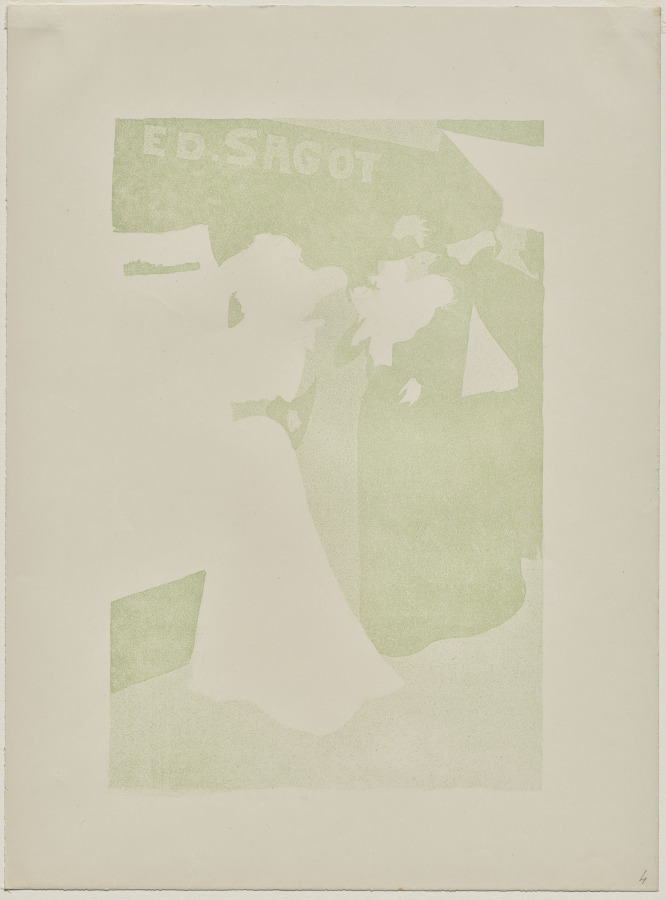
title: Sagot's Gallery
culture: France, 19th century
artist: Georges Alfred Bottini (French, 1874–1907)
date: 1898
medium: color separation proof in green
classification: Print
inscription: lower right, in graphite: 27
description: The last decades of the 19th century were the golden era of French color lithography. Jules Cheret (1836-1932) popularized the technique to make colorful posters which, by 1884, were also exhibited as a legitimate art form. In 1891 Cheret began to design posters without lettering to frame and hang on walls---still an unusual idea since prints were usually stored in portfolios. The explosion in color lithography was also encouraged by the use of zinc plates, which were lighter, cheaper, and more pliable than traditional lithographic stones. Also important was the formation of artist's organizations like the Société des artistes lithographie (Society of Lithographic Artists) and the Société de l'estampe originale (Society of Original Prints), which stimulated original printmaking. By the 1890s a proliferation of fine printers, independent exhibitions, publications devoted to prints, critics, publishers, and dealers like Sagot, all supported color lithography.